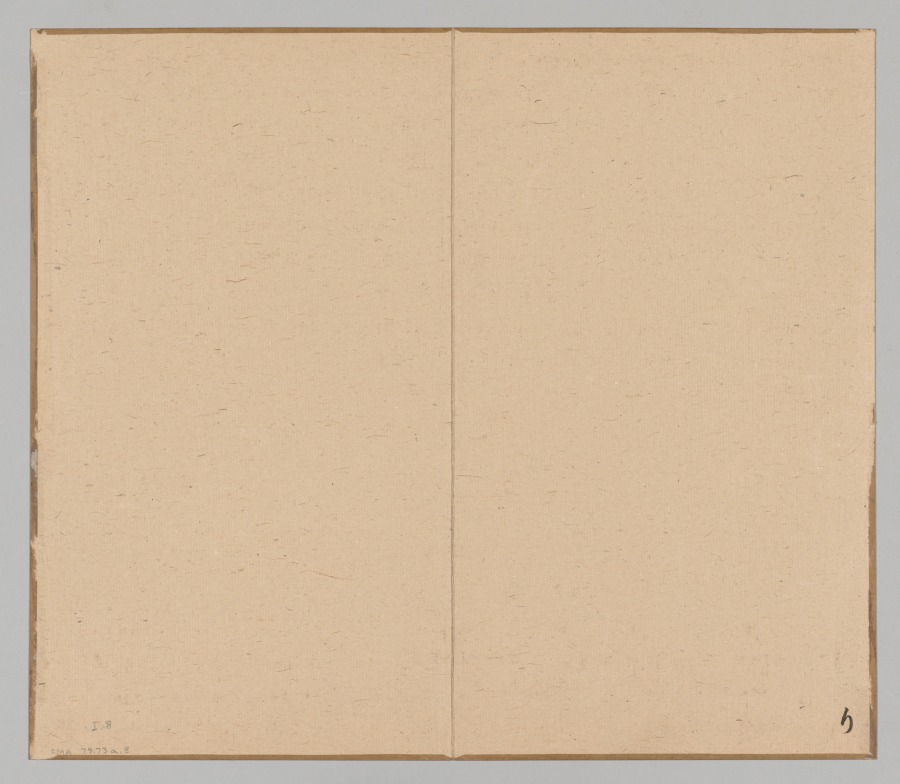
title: Reverberations of Taiga, Volume 1 (leaf 8)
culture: Japan, Edo period (1615–1868)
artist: Aoki Shukuya (Japanese, d. 1802)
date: mid- to late 1700s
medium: double-leaf from a pair of albums; ink and light color on paper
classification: Portfolio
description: Traditionally, young painters in Japan began their studies with an established master-painter. The master's compositions invariably became models that the apprentice copied to learn various ink and brush techniques. Shukuya was a pupil of the famous Kyoto artist Ikeno Taiga, whose style is reflected in these sketches of rocks, trees, and mountains.